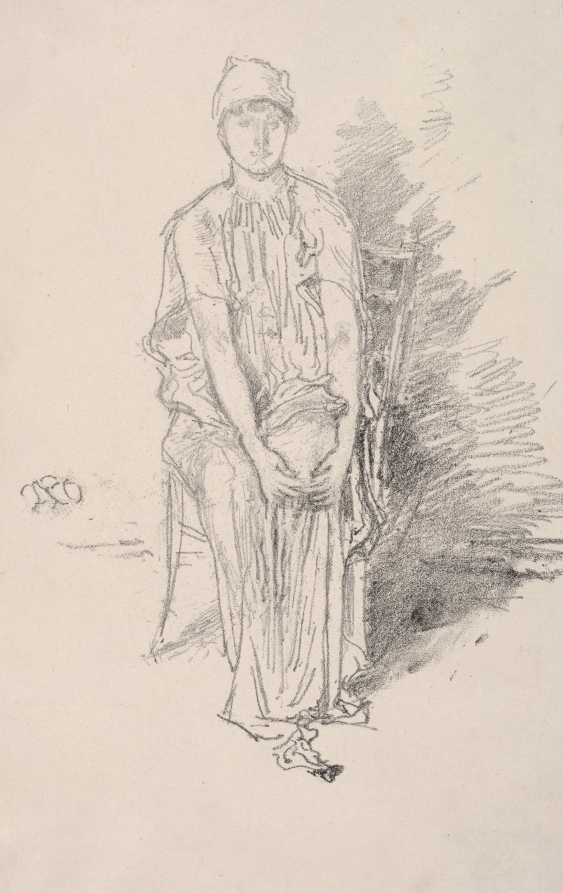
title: Figure Study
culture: America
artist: James McNeill Whistler (American, 1834–1903)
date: 1890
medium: lithograph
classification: Print